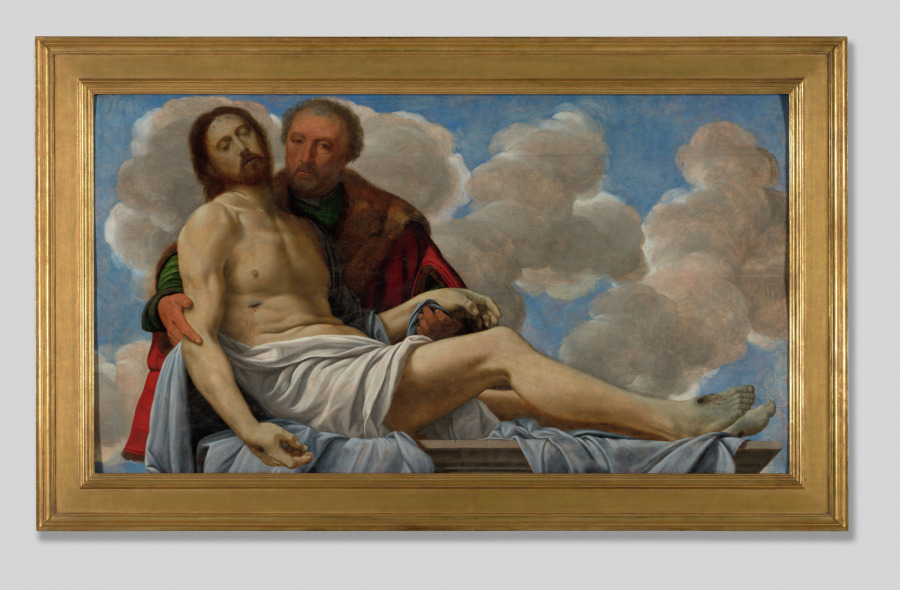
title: Christ with Joseph of Arimathea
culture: Italy, 16th century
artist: Giovanni Girolamo Savoldo (Italian, c. 1480–after 1548)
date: c. 1525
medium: oil on wood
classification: Painting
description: After the Crucifixion, Joseph of Arimathea obtained permission to bury Christ’s body in Joseph’s own tomb. Aside from an amorphous, cloudy sky, Savoldo eliminated the background entirely and reduced the narrative to two monumental figures, brought to the front of the picture plane. These qualities surely had a great impact on Caravaggio, who initially trained in Northern Italy, where Savoldo spent his career. This work originally hung over a large altarpiece, which explains the unusual perspective, the panel’s horizontal shape, and the figures’ position above the viewer.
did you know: This panel originally crowned the largest painting Savoldo ever made for a public setting.